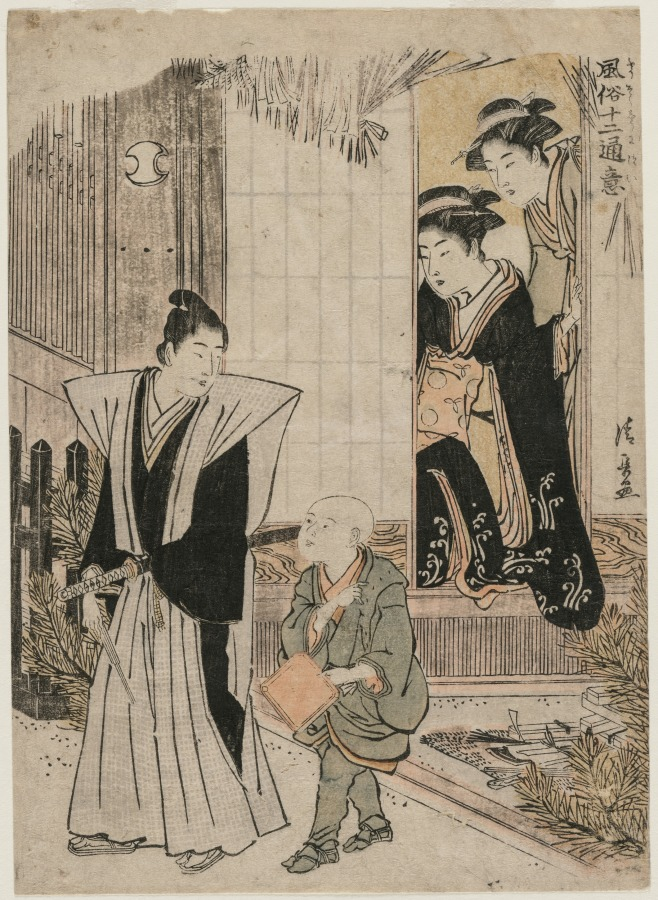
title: The First Month (from the series Popular Presentations)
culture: Japan, Edo period (1615–1868)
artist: Torii Kiyonaga (Japanese, 1752–1815)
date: 1782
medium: color woodblock print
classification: Print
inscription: Signature: Kiyonaga ga